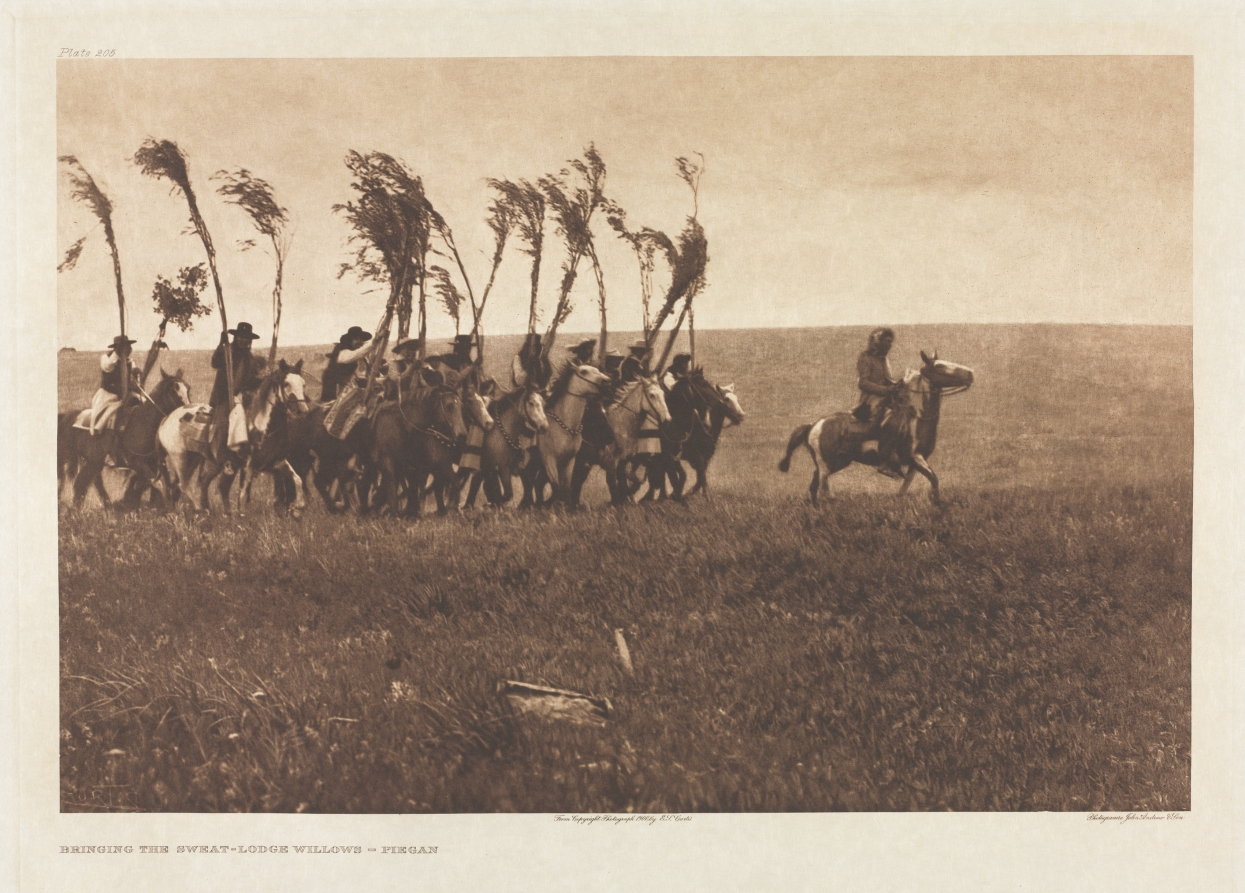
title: Portfolio VI, Plate 205: Bringing the Sweat-Lodge Willows - Piegan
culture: America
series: The North American Indian: being a series of Portfolios picturing and describing the Indians of the United States, the Dominion of Canada, and Alaska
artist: Edward S. Curtis (American, 1868–1952)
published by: The University Press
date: 1900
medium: photogravure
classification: Portfolio